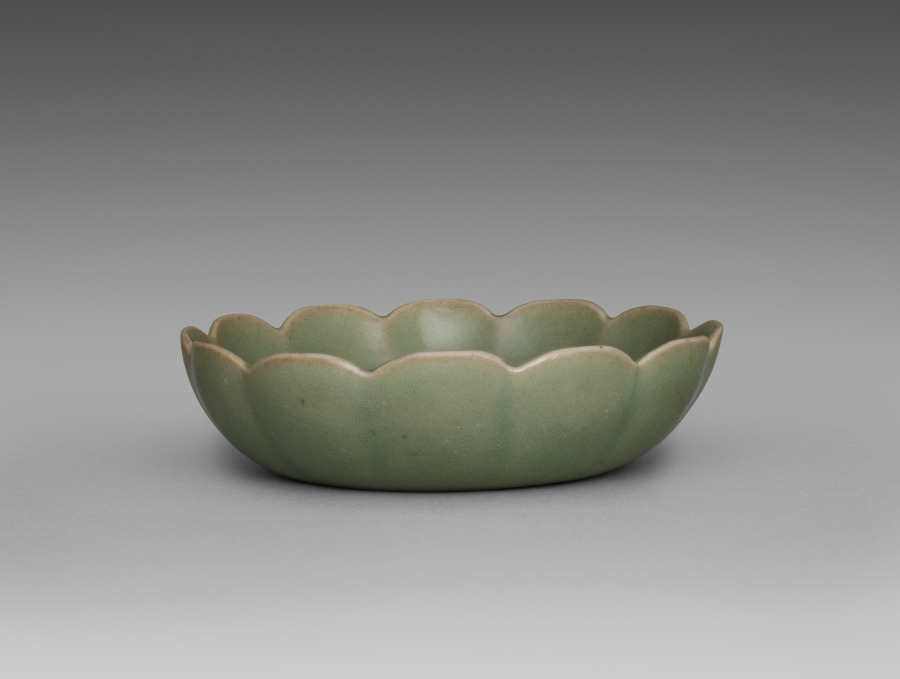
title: Celadon Dish with Molded Phoenix Design in the Shape of a Flower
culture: Korea, Goryeo dynasty (918–1392)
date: 1200s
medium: Celadon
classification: Ceramic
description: Celadon wares intended for everyday use—such as this dish—were among the most common burial objects placed in tombs during the Goryeo period (918–1392). Furnishing tombs with elaborate assemblages of objects was believed to honor the deceased and provide comfort in the afterlife. This dish, featuring the image of a flying phoenix, was likely a cherished possession that accompanied its owner to their final resting place.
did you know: The phoenix motif at the center of this dish symbolizes cosmic harmony and prosperity in traditional East Asian cultural and artistic expression.